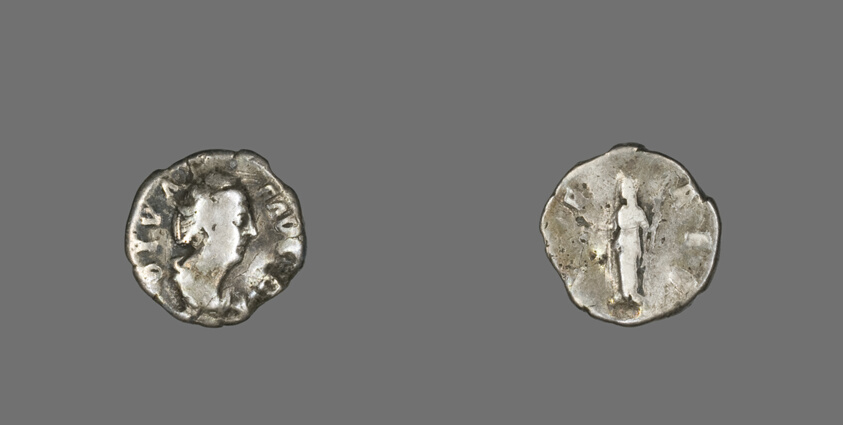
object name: Coin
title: Denarius (Coin) Portraying Empress Faustina the Elder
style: roman (ancient, style or period), ancient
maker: Roman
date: 141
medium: Silver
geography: Milan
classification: coin; ancient art